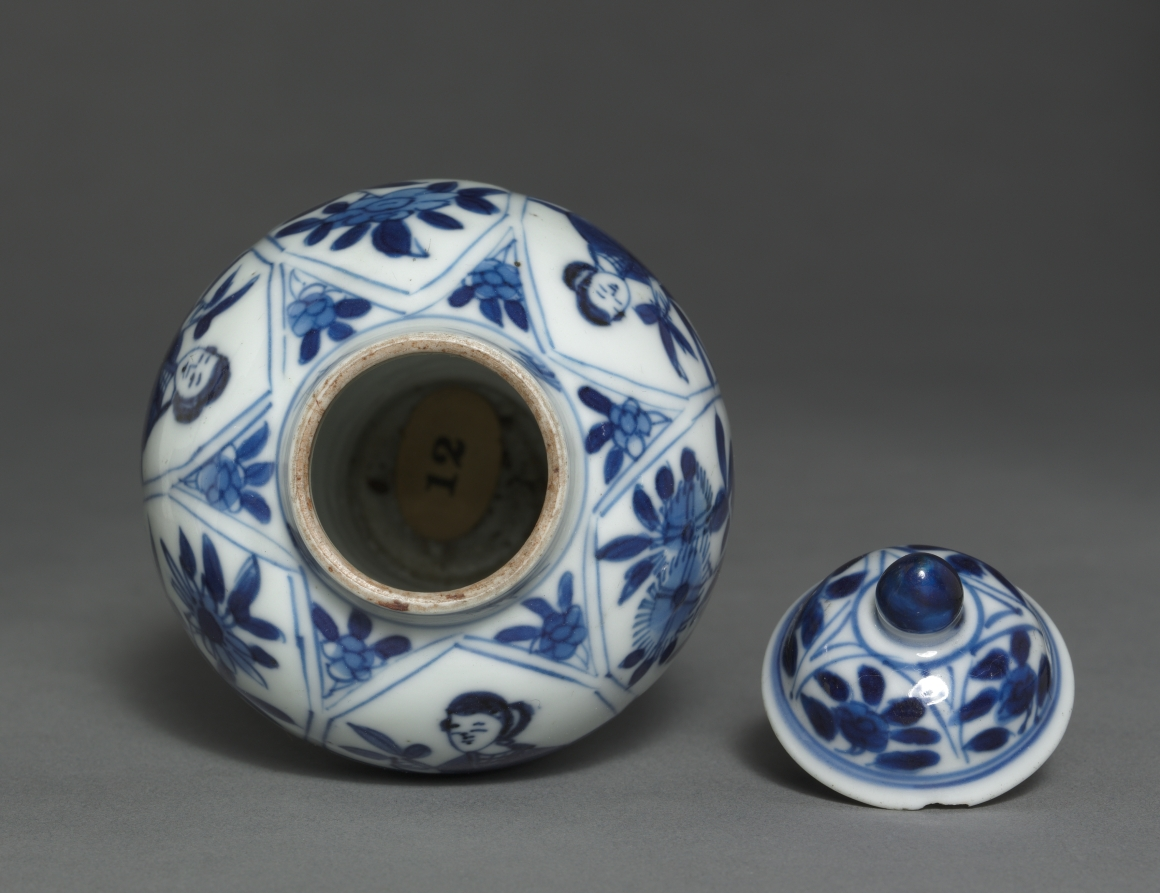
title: Jar with Cover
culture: China, Qing dynasty (1644-1911)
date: 19th Century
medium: porcelain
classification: Ceramic